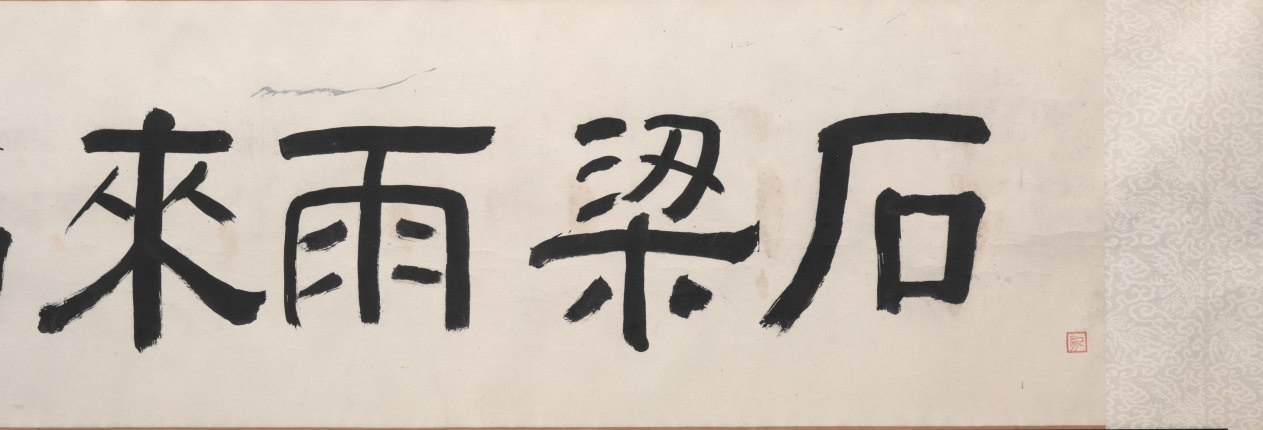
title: Rain-coming Pavilion by the Stone Bridge at Mt. Tiantai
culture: China, Qing dynasty (1644-1911)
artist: Dai Xi (Chinese, 1801–1860)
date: 1848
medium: handscroll, ink on paper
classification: Painting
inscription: Artist's inscription, signature, and 2 seals: Painting of Rain-Coming Pavilion by the Stone Bridge at Mount Tiantai. In the twenty-eighth year of the Daoguang era [1848], the third lunar month, requested by and painted for Pan Gongfu 潘功甫 [Pan Zengyi 潘曾沂], a senior family friend. [signed] Your junior, Dai Xi from Qiantang. [seal] Hebi jian Dai 何必見戴. [seal, lower right corner] Shih-ping yeh.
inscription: Title on frontispiece and 3 seals of Ruan Yuan (1764-1849). 1 colophon and 10 additional seals: 1 colophon, dated 1838, and 8 seals of Pan Zengyi (1792-1853); 2 seals unidentified.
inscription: Colophon by Pan Zengyi: The T'anhua [a flower that blooms only momentarily in semi-tropical areas] Pavilion near Shiliang [the natural stone bridge] was built by the Grand Chancellor Jia. It lasted over seven hundred years. After it was destroyed this year, I happened to be there, so I suggested it be reconstructed. Among the six poems commemorating my visit, one reads: The career of the Prime Minister may be as great as the rivers and lakes,/ Unaware himself of the fact there is leaking./ I had been all over the seventy-two peaks of P'eng-lai mountains/ When the timely rain came to T'an-hua Pavilion. It had not been raining for a long time there, then unexpectedly, the rain came simultaneously with my arrival; the old monk there asked me to change the name to Rain-Coming Pavilion, in order to record the joy. The hilly fields at Mt. Tiantai have suffered by droughts. If, from this year on, they have the timely rain to bring along bountiful harvests and make people happy - so may this pavilion be our witness. Hsiao-fu shan-jen, Pan Zengyi recorded this on the first day of the twelfth lunar month in the wuxu year [1838]. Chiang Yung-ching copied respectfully on the first day of the sixth lunar month in the wushen year [1848]. trans. LYSL/WKH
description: The subject is not just Mount Tiantai in Zhejiang Province, the ancient seat of the most powerful Buddhist sect of Sui and Tang dynasties, but records a specific occasion in 1838 when an official visited Tiantai and began the reconstruction of a historic pavilion. As this coincided with the end of a long drought, the building was auspiciously renamed the Yulai (Rain-Coming 雨來) Pavilion. Ten years later, Dai Xi painted this handscroll to commemorate the occasion.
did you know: Dai Xi actively resisted the Taiping rebels and drowned himself after their 1860 capture of his hometown, Hangzhou. For this loyal deed, Dai was posthumously rewarded with a temple built in his name.